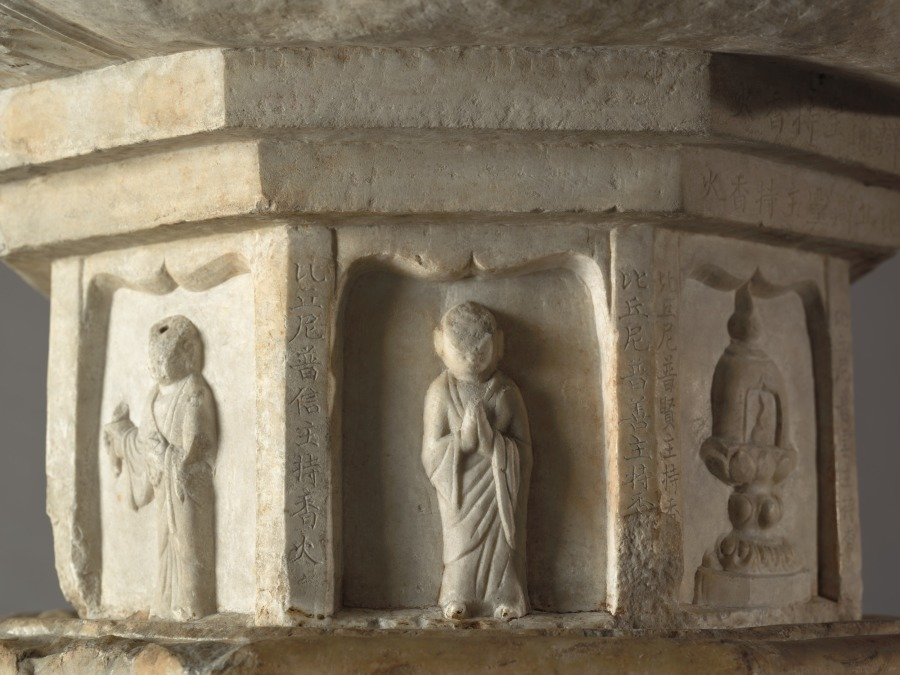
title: Fang Xuanling Pedestal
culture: China, Tang dynasty (618-907)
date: 647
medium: marble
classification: Sculpture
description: This double lotus pedestal exhibits the rich, ornate style of early Tang sculpture. It was commissioned by the Duke of Liang, Fang Xuanling (578–648), for the blessing of his second son and daughter-in-law, the Tang imperial princess of Gaoyang. The iconography and inscription suggest that it originally went with a statue, now missing, of Shakyamuni, the historical Buddha, instead of Amitayus. Today the pedestal is topped with Amitayus, the Buddha of Infinite Life, seated in meditation. Although the pedestal was not made with the statue, the combination is faithful to the original artistic conception.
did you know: In front, the top layer of the pedestal has an abstract curvilinear motif suggesting drapery; the rear is carved with a flower-and-leaf motif.